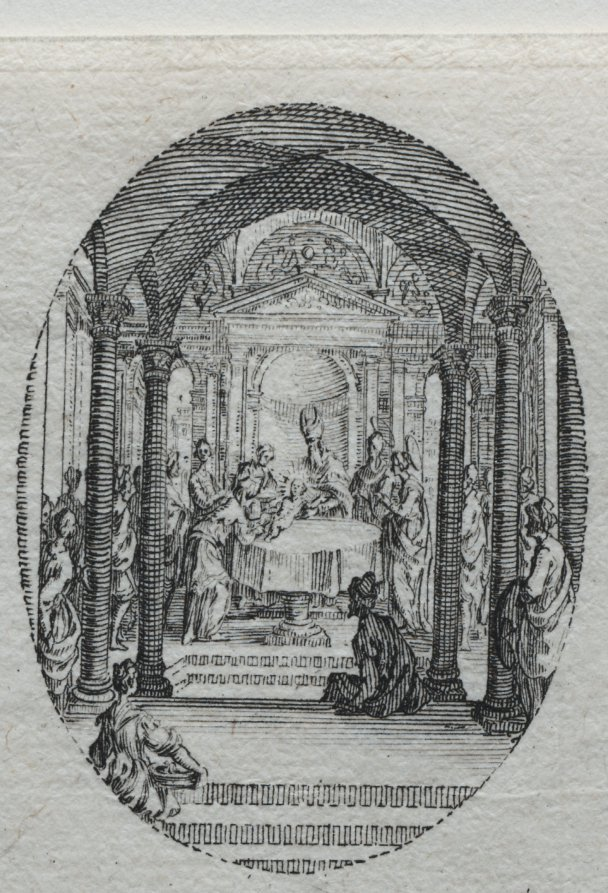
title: The Mysteries of the Passion: The Circumcision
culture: France, 17th century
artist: Jacques Callot (French, 1592–1635)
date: 1631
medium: etching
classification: Print